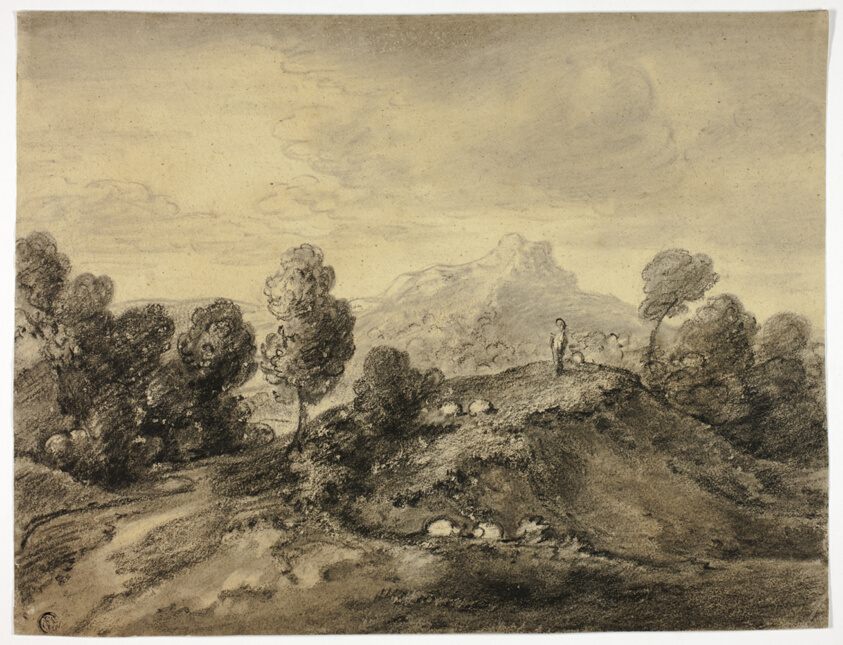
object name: Drawing and Watercolor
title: Hilly Landscape with Shepherd and Flock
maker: Follower of Thomas Gainsborough; English, 1727-1788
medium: Charcoal with stumping on tan wove paper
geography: England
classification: chalk; drawings (visual works); prints and drawing